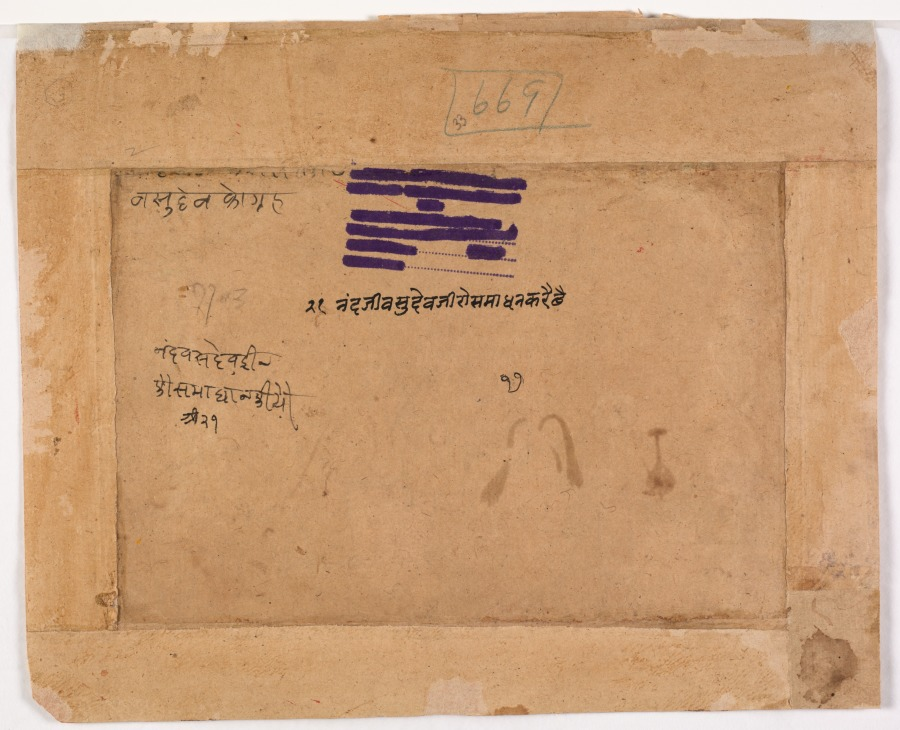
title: Nanda Solves Vasudeva’s Dilemma, from a Bhagavata Purana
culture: Northwestern India, Rajasthan, Rajput Kingdom of Bikaner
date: c. 1610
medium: Gum tempera and gold on paper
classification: Painting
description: Three cowherd boys stand behind their village elder Nanda, who agrees to hide the newborn Krishna, an incarnation of a Hindu god. At the left is Krishna’s father, Vasudeva, who has made this request in order to protect the child from slaughter by the despotic king, who had heard a prophecy that Krishna would one day kill him. This painting is from a series depicting scenes from a sacred Hindu text and was part of the royal Bikaner collection. The simple, geometric composition, profile views, and flat planes of color show adherence to long-standing local artistic styles.